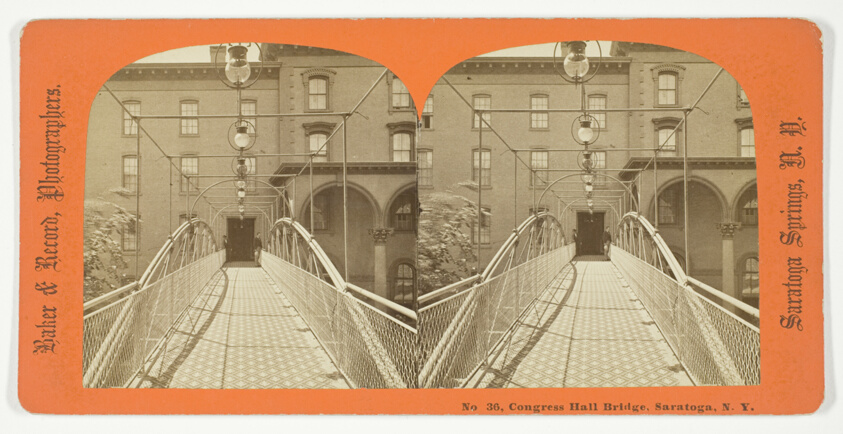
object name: Photograph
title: Congress Hall Bridge, Sartoga, N.Y.V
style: 19th century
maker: Baker & Record, Photographers (American, active late 19th century)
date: 1875/99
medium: Albumen print, stereo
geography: Saratoga Springs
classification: photography; photograph